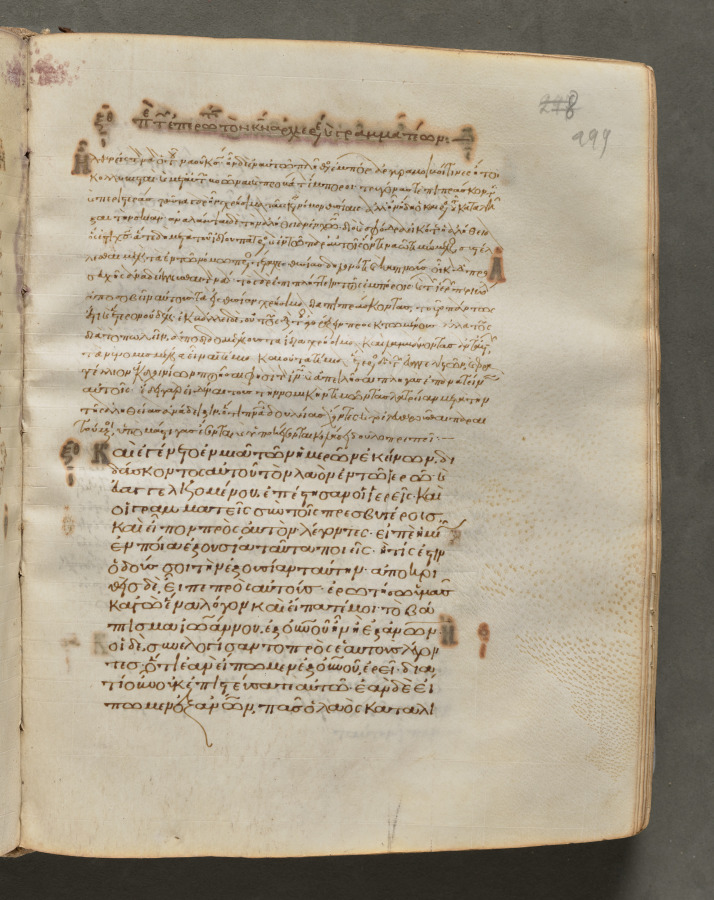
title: Text, folio 299 (recto), from a Gospel Book with Commentaries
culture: Byzantium, Constantinople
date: c. 1000–1100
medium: ink, tempera, and gold on vellum; leather binding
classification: Bound Volume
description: Each of the four gospels in this book opens on a page with brilliantly illuminated borders depicting the author of the text as well as birds—principally peacocks, symbols of the immortality of the soul—and fountains, representing the fountain of life and the salvation of the soul. This volume consists of 428 leaves with texts in Greek. Its level of sophistication suggests that it was probably written and decorated in a monastery in Constantinople.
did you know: Gospel books were carried in procession through Byzantine churches.